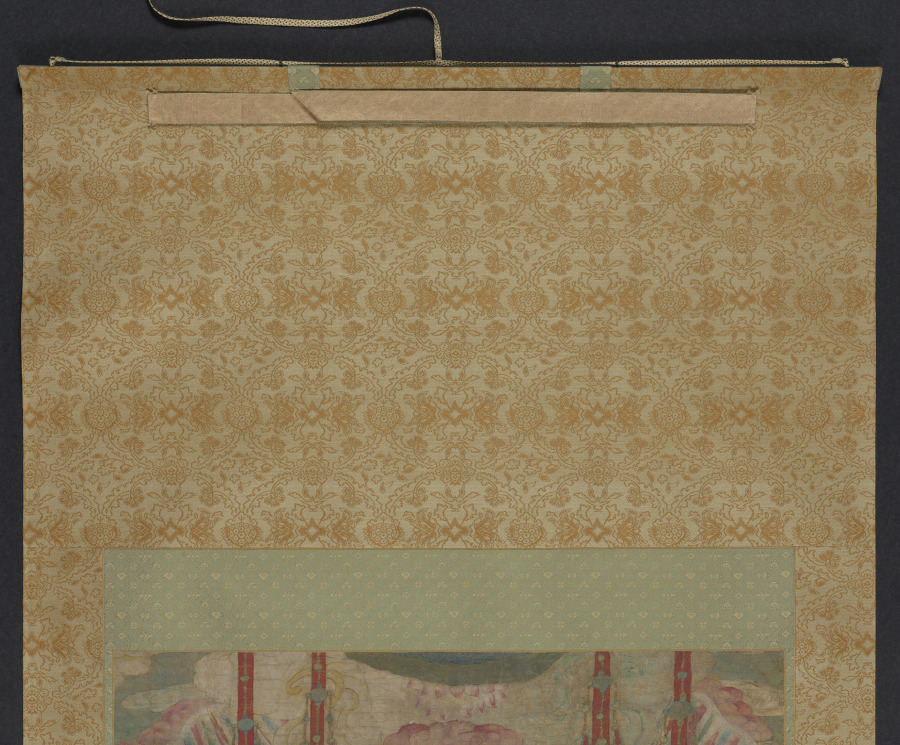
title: Seated Amitābha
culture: Chinese, Ming dynasty (1368-1644)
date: late 1500s–early 1600s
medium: hanging scroll; ink and color on silk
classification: Painting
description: This magnificent Buddha, called Amitābha (literally, “infinite light”) is seated on a lotus pedestal with both palms facing up over crossed legs, suggesting that it is in deep meditation. In contrast to the richly ornamented throne on which the Buddha is seated, the figure itself is devoid of any jewelry or decorative attributes, emphasizing its enlightened status and detachment from worldly affairs. The lion head in the center of the pedestal is a motif from Central Asia, which can also be seen in the halo or nimbus of Chinese Buddhist stone steles.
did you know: Originally, this scroll was acquired by the museum as a Korean work, but has now been tentatively reattributed as Ming period Chinese.